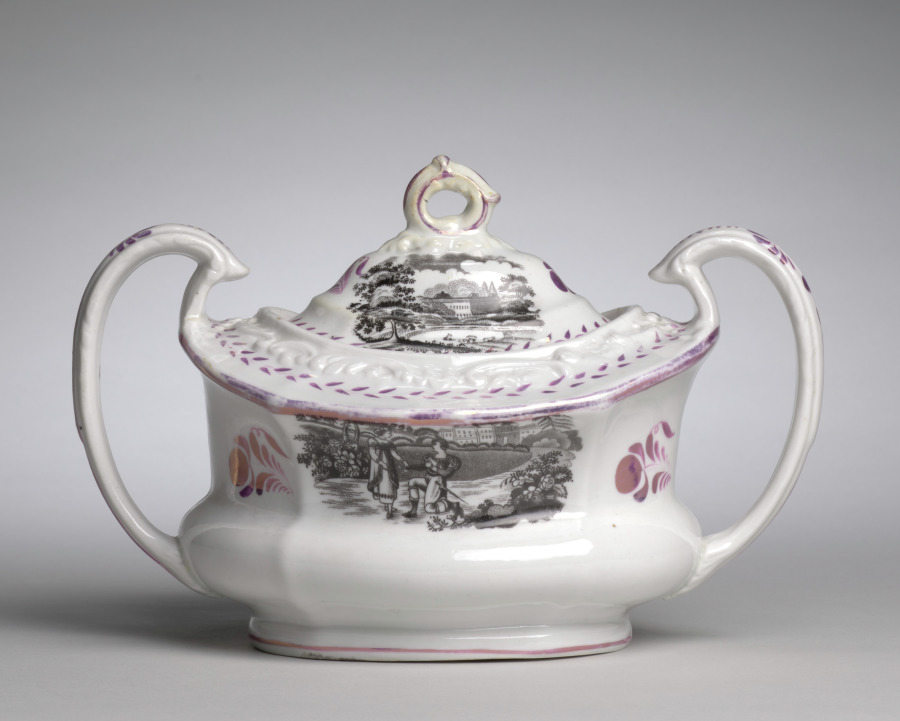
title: Sugar Bowl and Lid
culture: England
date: c. 1800–1825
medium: earthenware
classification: Ceramic